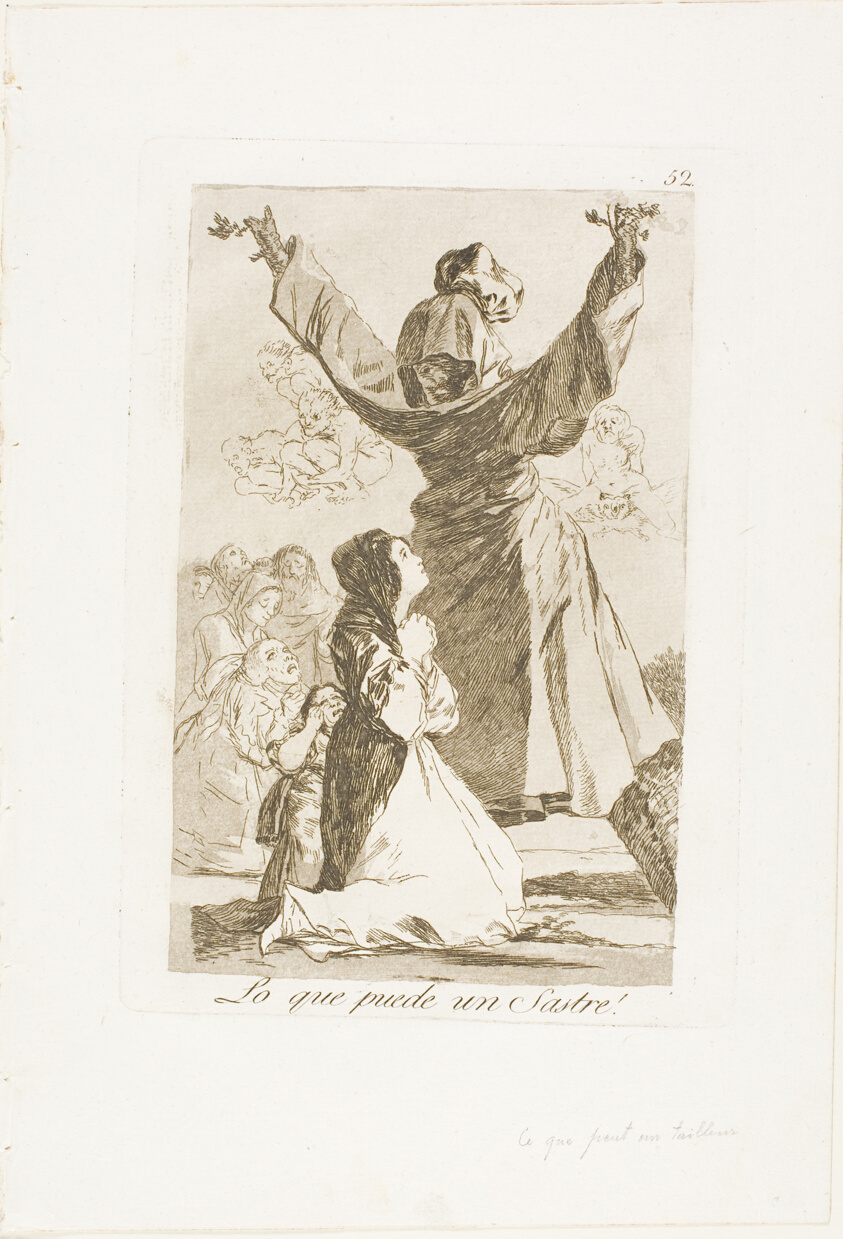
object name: Print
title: What a Tailor Can Do!, plate 52 from Los Caprichos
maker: Francisco José de Goya y Lucientes (Spanish, 1746-1828)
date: 1797/99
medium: Etching and aquatint on ivory laid paper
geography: Spain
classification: etching; print; prints and drawing